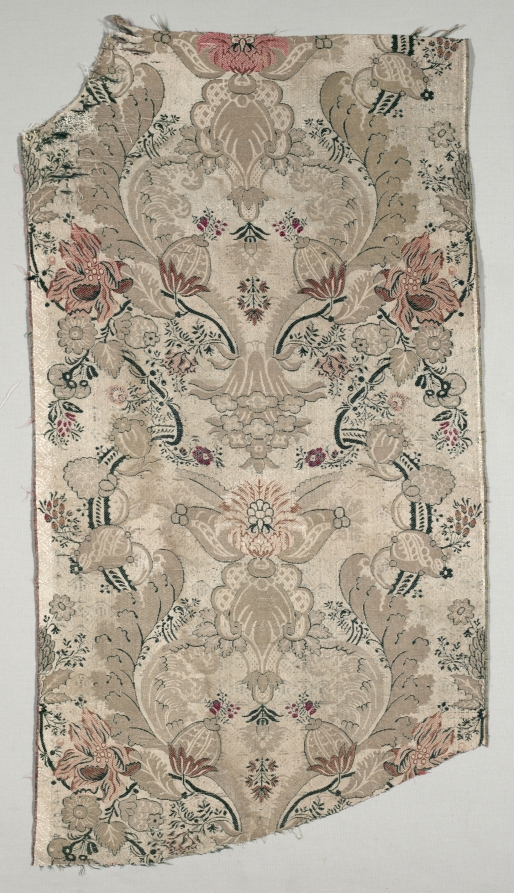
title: Silk Brocade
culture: France or Spain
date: early 1700s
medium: plain cloth, brocaded; silk and metal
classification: Textile